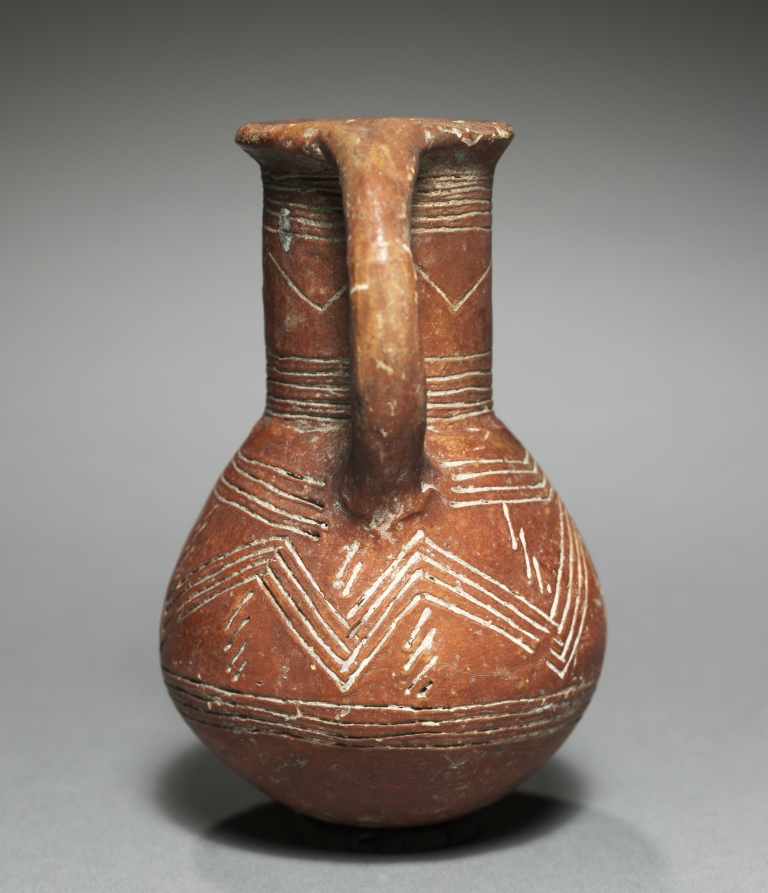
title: Jug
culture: Cyprus, early Cypriot III-middle Cypriot II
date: 2000–1800 BCE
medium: red ware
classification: Ceramic